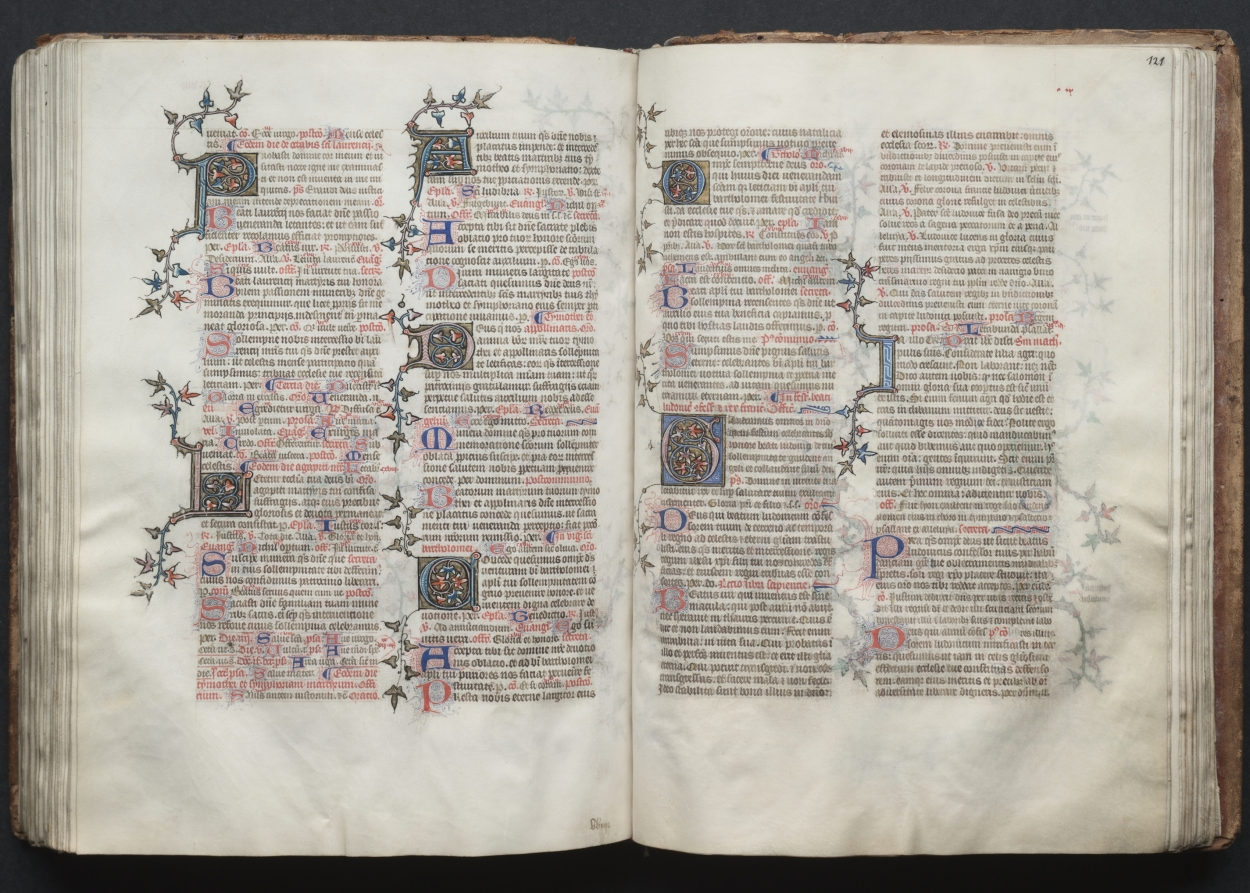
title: The Gotha Missal: Fol. 120v, Text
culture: France, Paris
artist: Master of the Boqueteaux (French)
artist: and Workshop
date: c. 1375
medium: ink, tempera, and gold on vellum; blind-tooled leather binding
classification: Bound Volume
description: The style and quality of this manuscript's decoration is typical of deluxe Parisian books made for aristocratic or royal patrons. Most of the book's decoration appears to be the work of the Master of the Boqueteaux, an artist active at the court of King Charles V (died 1380). His style was apparently shared by a number of book illuminators working in and around Paris. It is very possible that the Gotha Missal belonged to Charles V, but is not provable because the manuscript has no royal portraits and lacks a colophon. Given the book's magnificent decoration, however, it would seem that it was produced for a Valois prince, if not for the king himself. The manuscript receives its name from the German dukes of Gotha, its later owners.